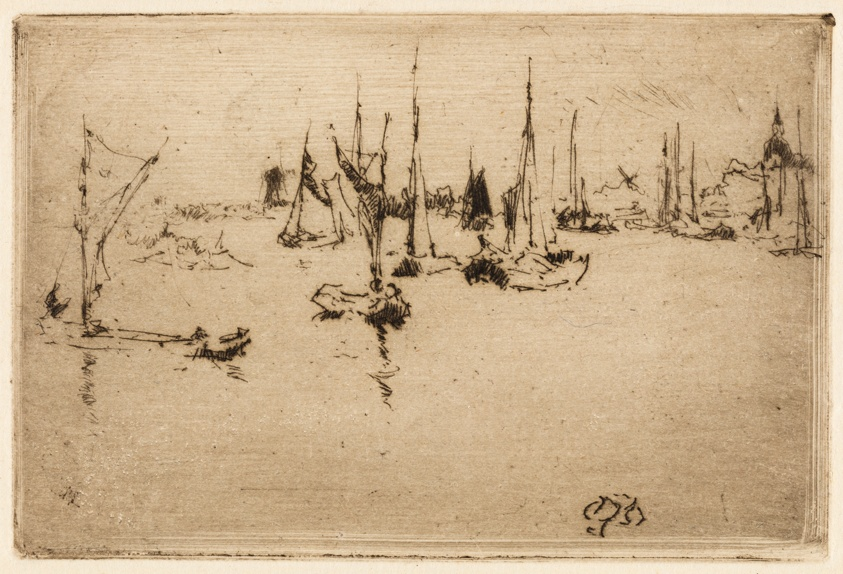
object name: Print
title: Barges, Dordrecht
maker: James McNeill Whistler (American, 1834-1903)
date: 1886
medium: Etching in black ink on cream laid paper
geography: United States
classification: etching; print; prints and drawing; paper